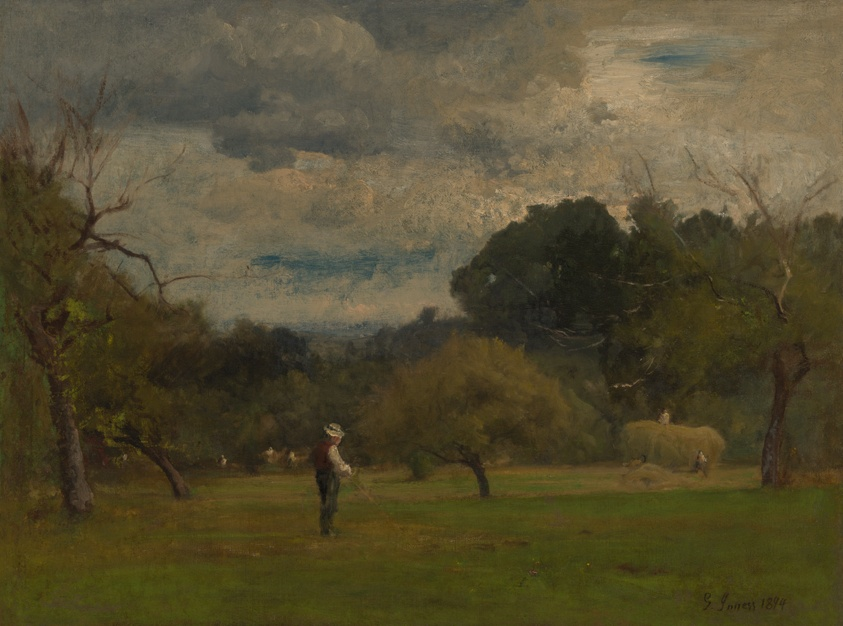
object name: Painting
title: Harvest, Montclair, New Jersey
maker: George Inness (American, 1825–1894)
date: 1884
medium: Oil on canvas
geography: United States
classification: painting; american arts